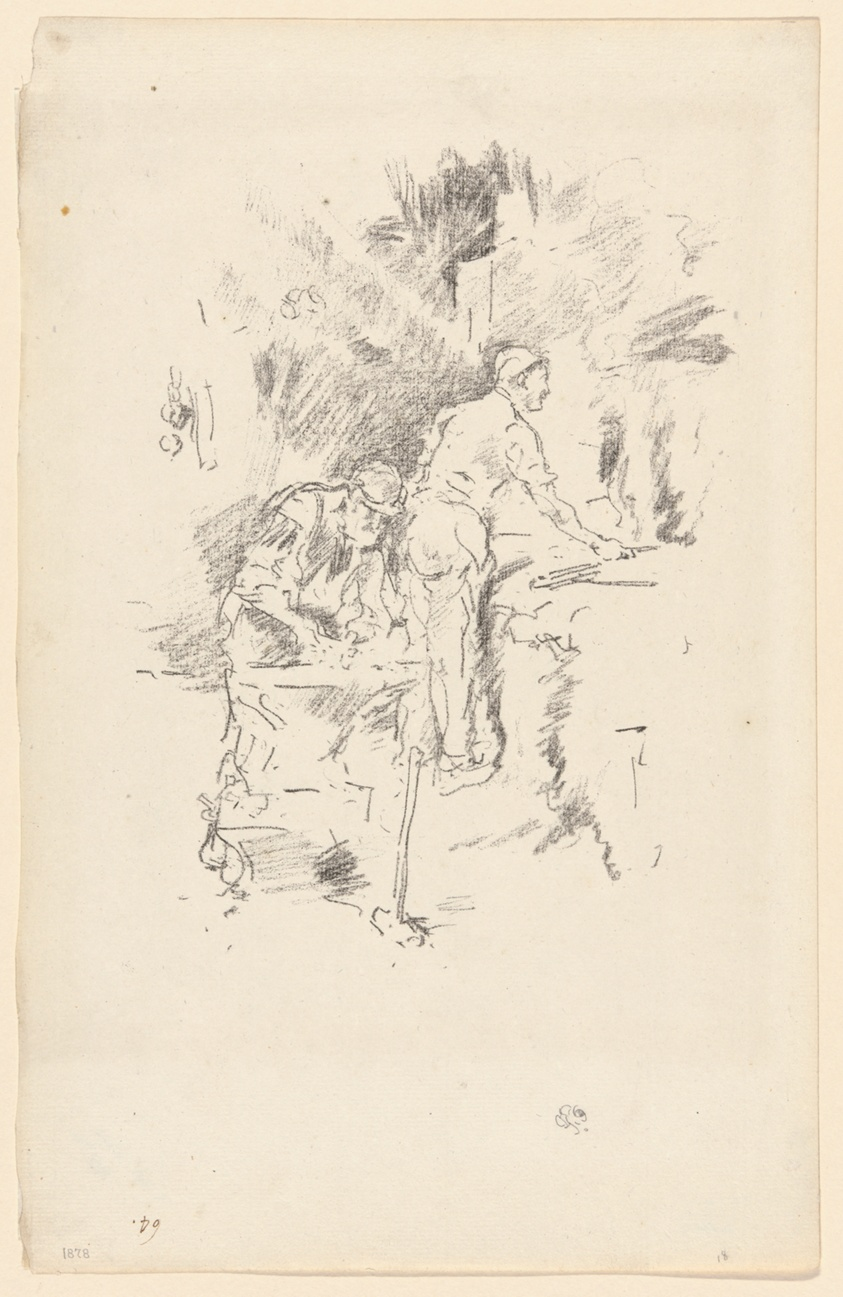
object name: Print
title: Father and Son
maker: James McNeill Whistler (American, 1834-1903)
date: 1895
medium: Transfer lithograph in black on ivory laid paper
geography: United States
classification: transfer lithograph; lithograph; print; prints and drawing; paper